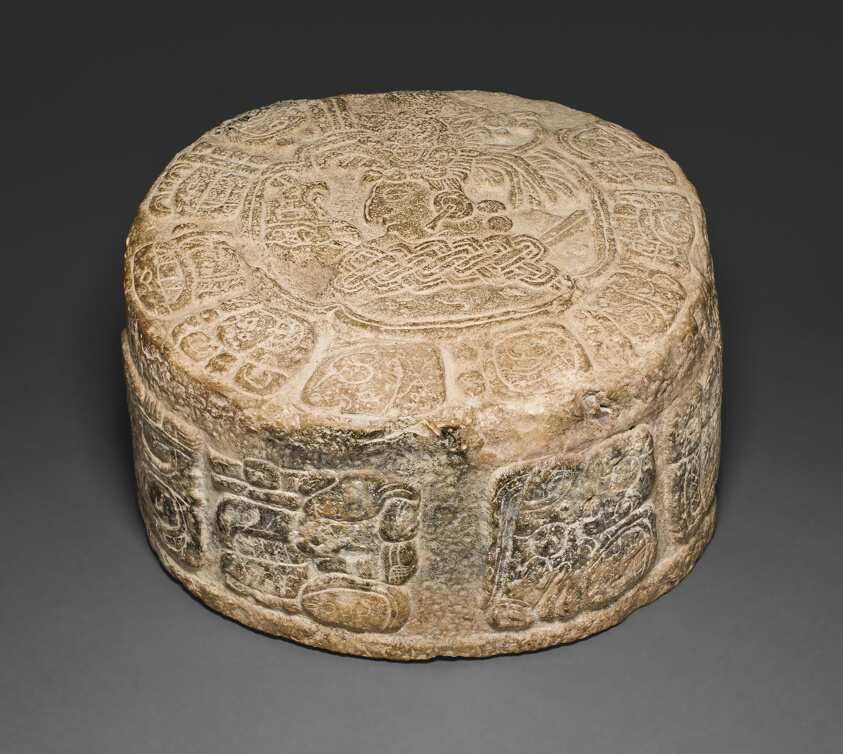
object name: Sculpture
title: Hieroglyphic Altar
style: maya, late classic, classic, mesoamerican, Pre-Columbian, americas, Arts of the Americas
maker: Late Classic Maya; Possibly Bonampak/Lacanha area, Mexico or Guatemala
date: 650–700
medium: Limestone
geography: Bonampak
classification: stone; altar; sculpture; art of the americas; carving; inscription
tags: ancestors, inscription, portraits, ritual, ritual objects, Hieroglyphs